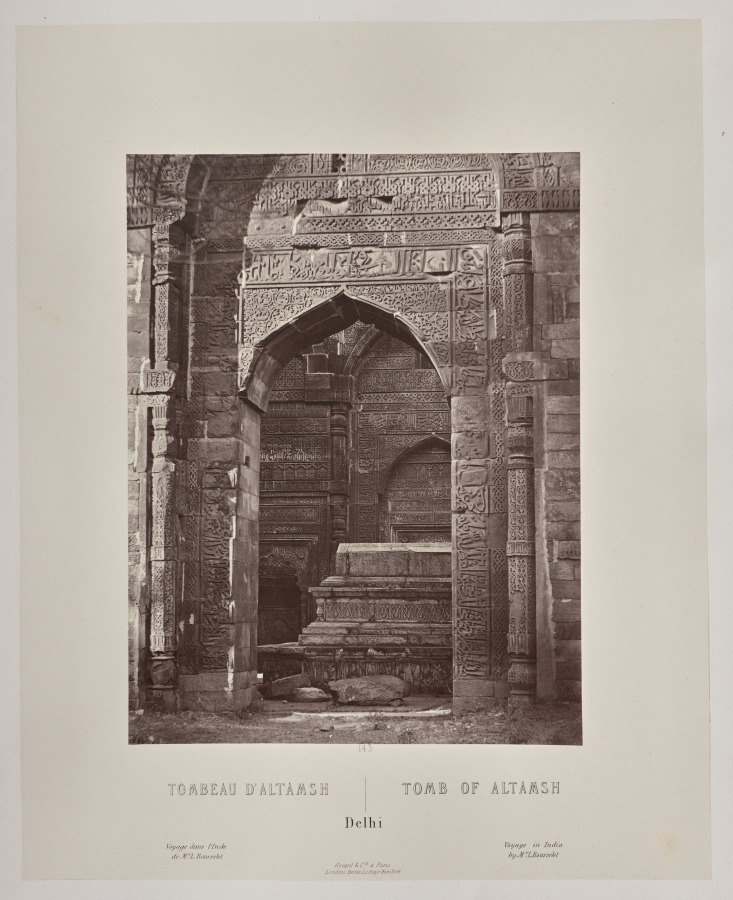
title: Tomb of Altamsh, Delhi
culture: France, 19th century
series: India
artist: Louis-Théophile Marie Rousselet (French, 1845–1929)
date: 1865–68, published 1869–70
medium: Albumen print from glass plate negative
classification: Photograph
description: Concerned that his drawings did not do justice to the splendor of India’s monuments, Rousselet learned photography in India that year, a remarkable accomplishment. He proved to be a talented photographer with a sophisticated sense of composition. The scenes in this volume sweep across sites of Sultanate, Rajput, and Mughal power in northern India, from the sacred Hindu city of Varanasi on the Ganges River to Alwar in Rajasthan. Also included are several scenes of industry and portraits of Indian rulers.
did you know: Louis Rousselet described himself as a “scientific traveler” when he went to India alone at age 18 in 1863 and stayed into 1868.